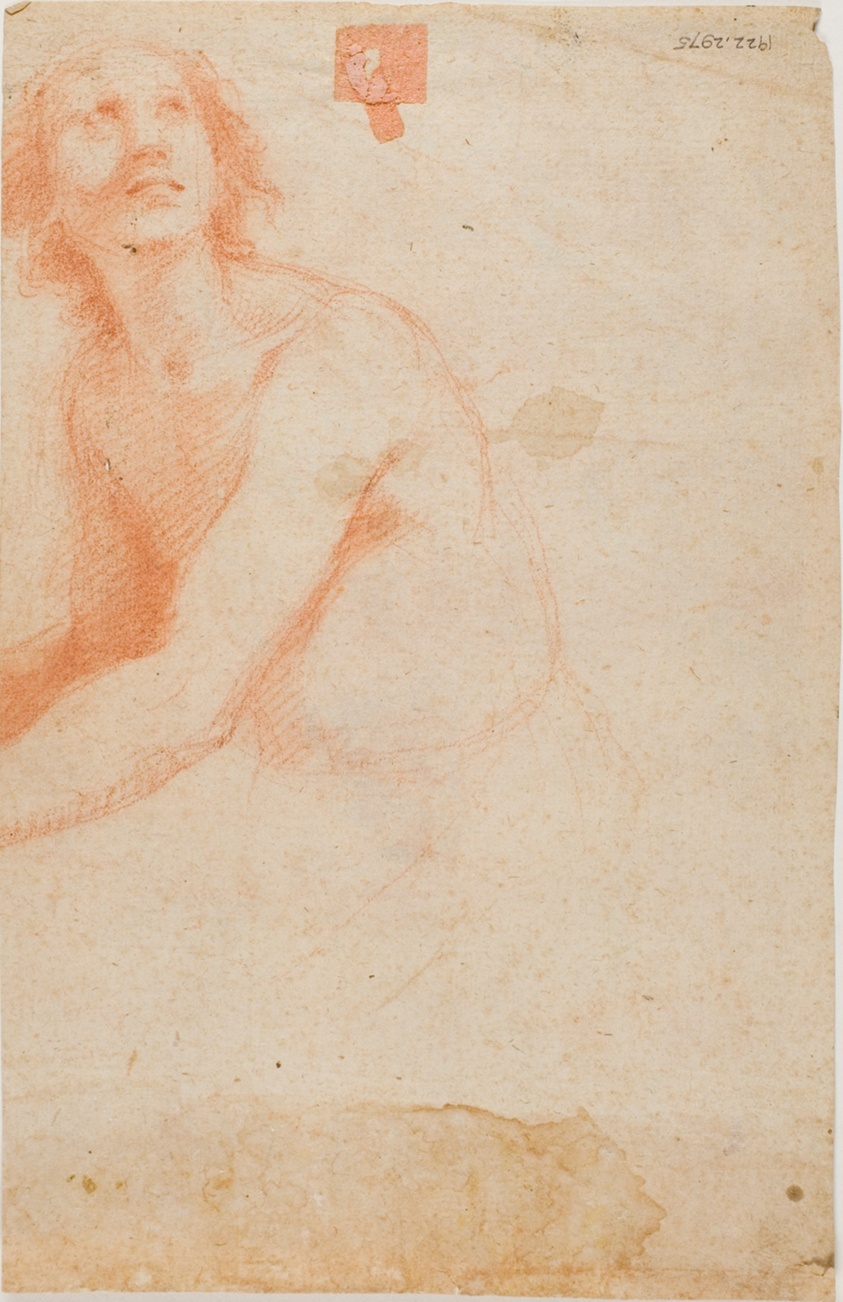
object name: Drawing and Watercolor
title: Figures Before Altar in Church (recto); Half-Length Male Nude, Looking Upward to Right (verso)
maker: Style of Francesco Furini (Italian, 1604-1646); or possibly Cecco Bravo (Italian, 1607-1661)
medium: Red chalk, heightened with lead white (discolored) (recto), and red chalk (verso), on ivory laid paper, tipped onto ivory laid paper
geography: Italy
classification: drawings (visual works); prints and drawing